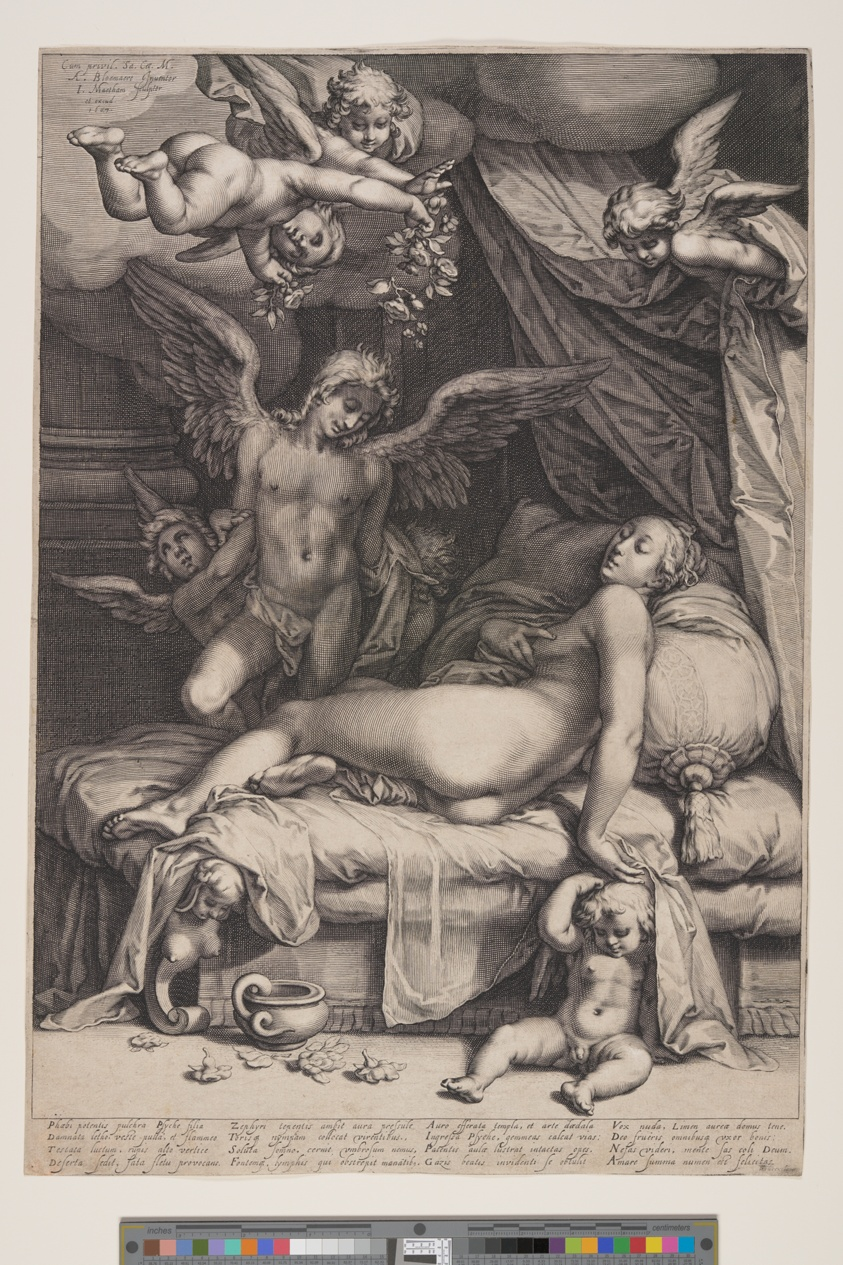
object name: Print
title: Cupid and Psyche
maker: Jacob Matham (Dutch, 1571–1631); after Abraham Bloemaert (Dutch, 1566–1651)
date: 1607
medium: Engraving on ivory laid paper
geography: Netherlands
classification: engraving; paper; print; prints and drawing